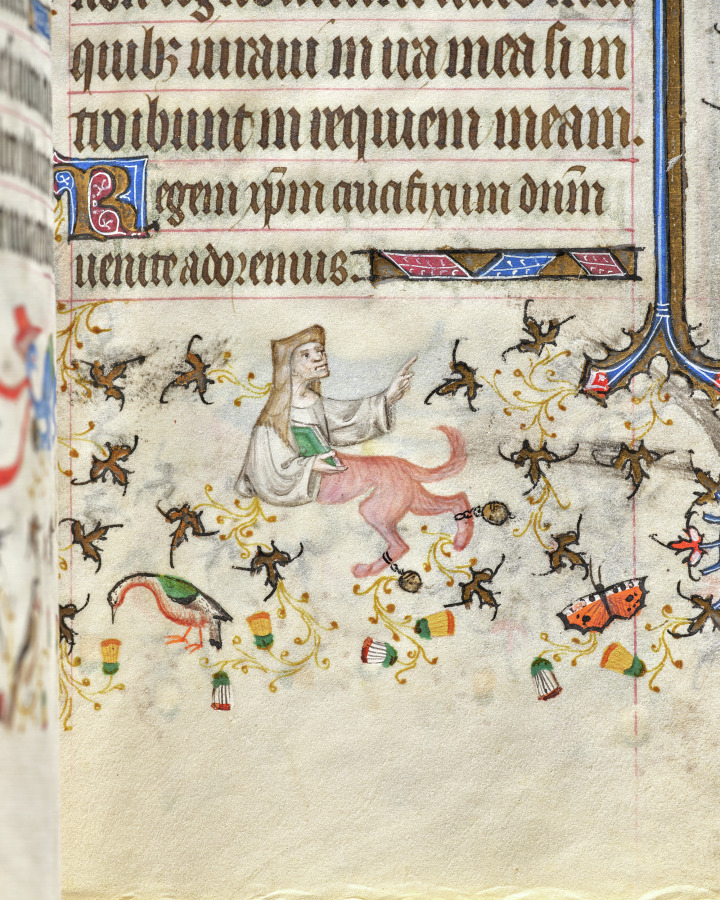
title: Hours of Charles the Noble, King of Navarre (1361-1425): fol. 146r, Text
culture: France, Paris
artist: Master of the Brussels Initials and Associates (French)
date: c. 1405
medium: ink, tempera, and gold on vellum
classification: Bound Volume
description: This precious volume was obviously highly prized by its owner, the French-born King of Navarre, who had his coat of arms painted on no less than twenty folios. Rather than directly commissioning this manuscript from a specific workshop, it seems that Charles the Noble acquired his book of hours -- perhaps ready-made for the luxury market -- while on a trip to Paris in 1404-05. A collaborative effort, six painting styles are evidenced within the pages of this codex, those of two Italians, two Frenchmen, and two Netherlanders. The painter who was responsible for the planning and decoration of the book, and who produced seventeen of the large miniatures, was a Bolognese artist known as the Master of the Brussels Initials. His principal assistant, responsible for most of the borders, was a Florentine who signed his name "Zecho" da Firenze on folio 208 verso.